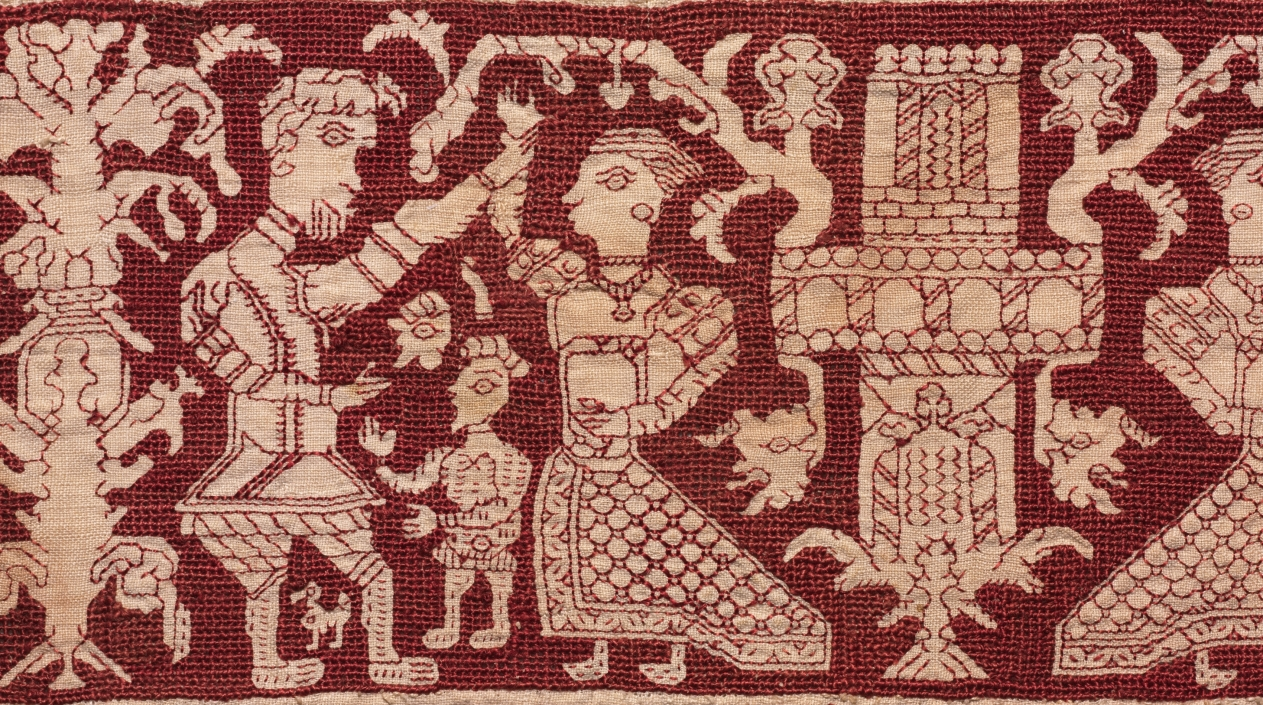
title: Embroidered Strip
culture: Italy, 16th century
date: 1500s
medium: embroidery; silk on linen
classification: Embroidery